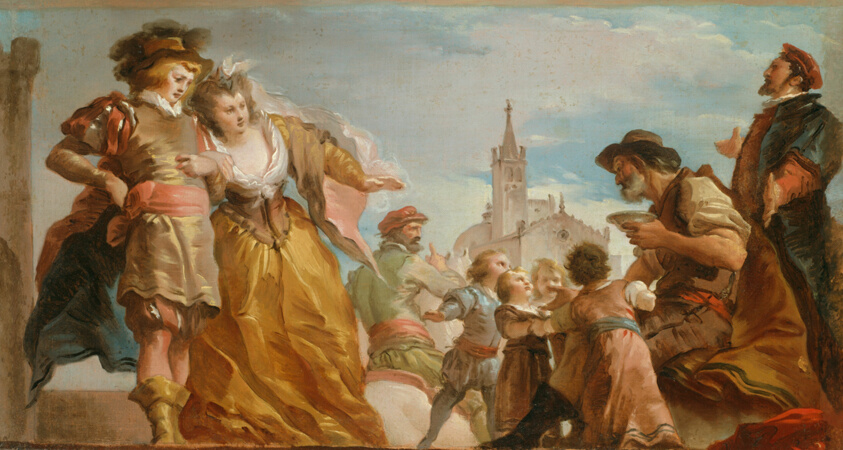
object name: Painting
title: The Meeting of Gautier, Count of Antwerp, and his Daughter, Violante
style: 18th Century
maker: Giuseppe Cades (Italian, 1750–1799)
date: c. 1787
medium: Oil on canvas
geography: Italy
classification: oil on canvas; Italian; oil paintings (visual works); paint; painting; european painting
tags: families, children, church, daughters, fathers, figures, men, people, sky, study, women